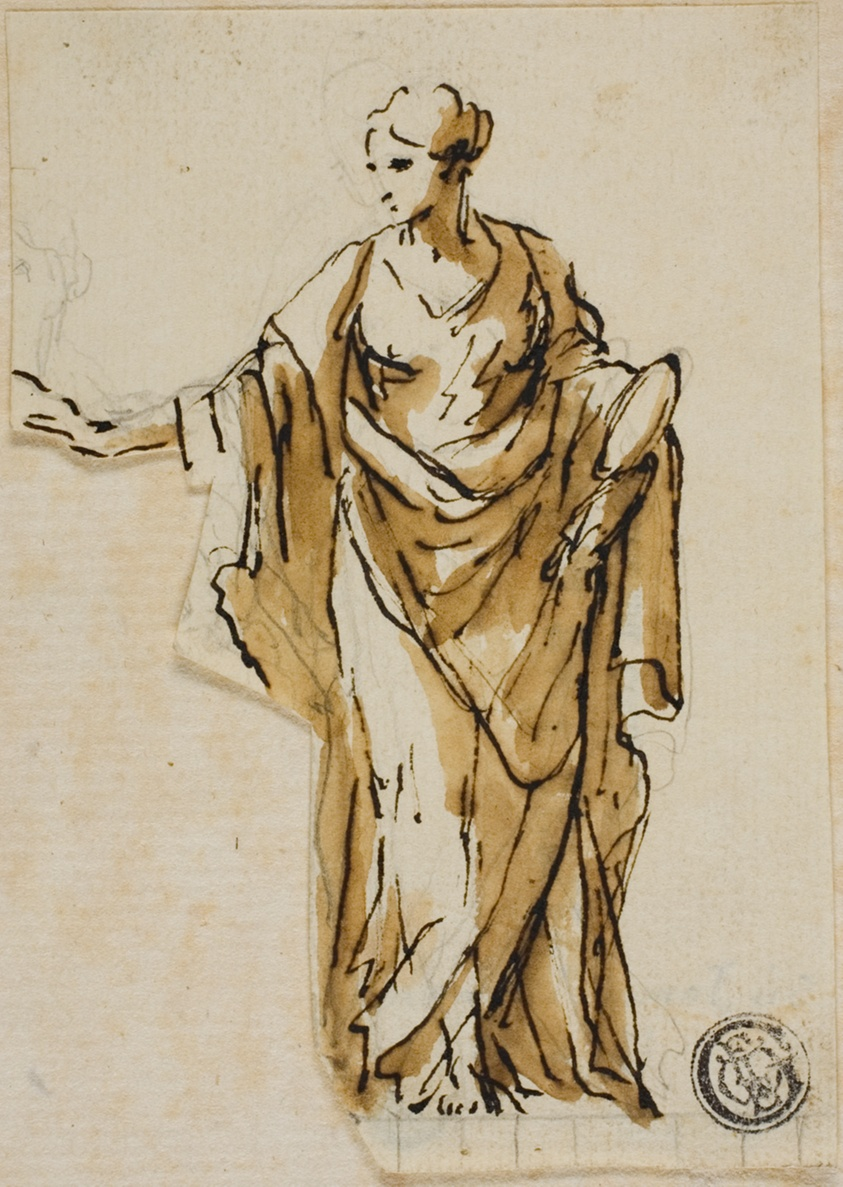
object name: Drawing and Watercolor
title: Standing Female Figure with Right Hand Raised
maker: John Michael Rysbrack (Flemish, 1693-1770); or James Thornhill (English, 1675-1734)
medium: Pen and brown ink, with brush and brown wash, over graphite, on ivory laid paper, tipped onto ivory laid paper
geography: Flanders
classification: pen and ink drawings; drawings (visual works); prints and drawing